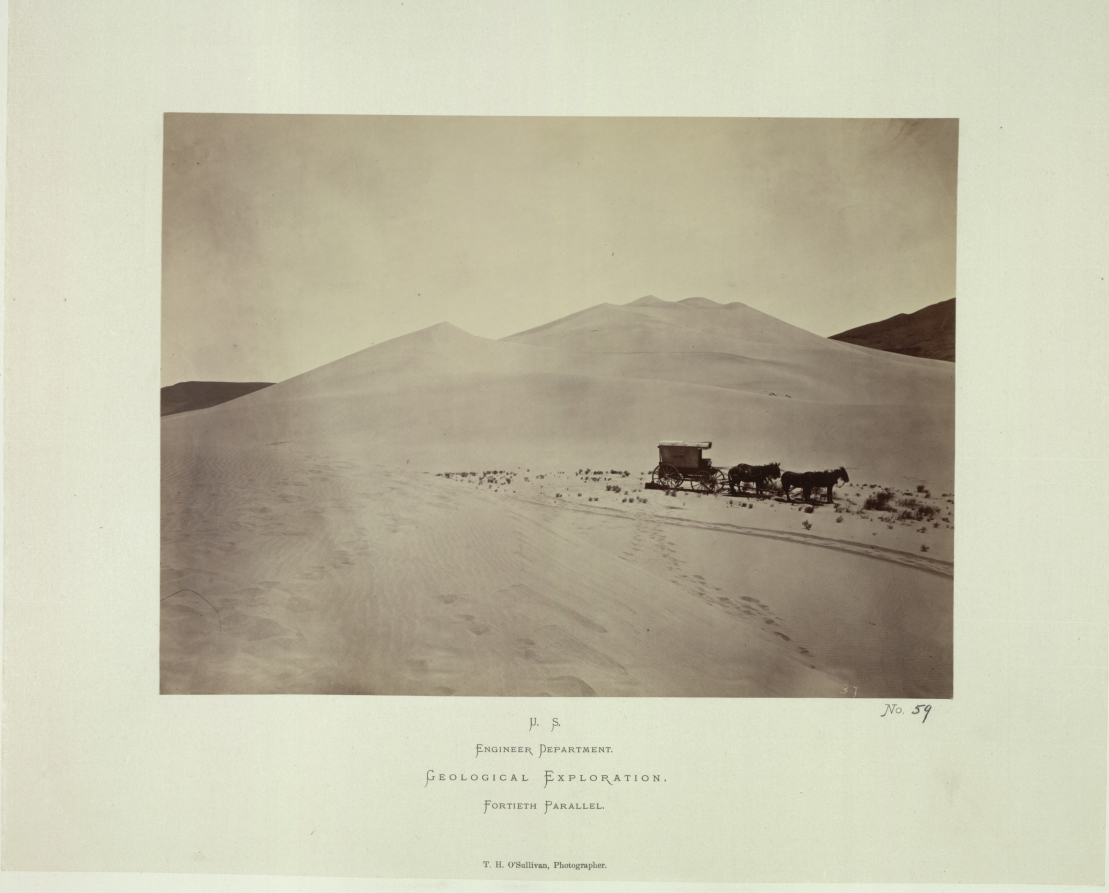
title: Sand Dunes, Carson Desert, Nevada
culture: America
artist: Timothy H. O'Sullivan (American, 1840–1882)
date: 1867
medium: albumen print from wet collodion negative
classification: Photograph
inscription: imprinted in black ink on recto: "U.S./ ENGINEER DEPARTMENT/ GEOLOGICAL EXPLORATION/ FORTIETH PARALLEL"; "T.H.O'Sullivan Photographer"; "No. 59" (highlighted in black)"; in black ink on mount: "Sand Dunes near Sand"; in pencil on mount: "K1130"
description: This noontime scene conveys a desolate place discovered by a lonely explorer. The artist chose a vantage point and framing that blocked the horizon and showed a single wagon—the former Civil War ambulance that he converted into a portable darkroom—and only two sets of footprints. However, over the previous 25 years, more than 165,000 people had passed near here on their way to California.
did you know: O’Sullivan took this while on a government expedition analyzing the future path of the transcontinental railroad.